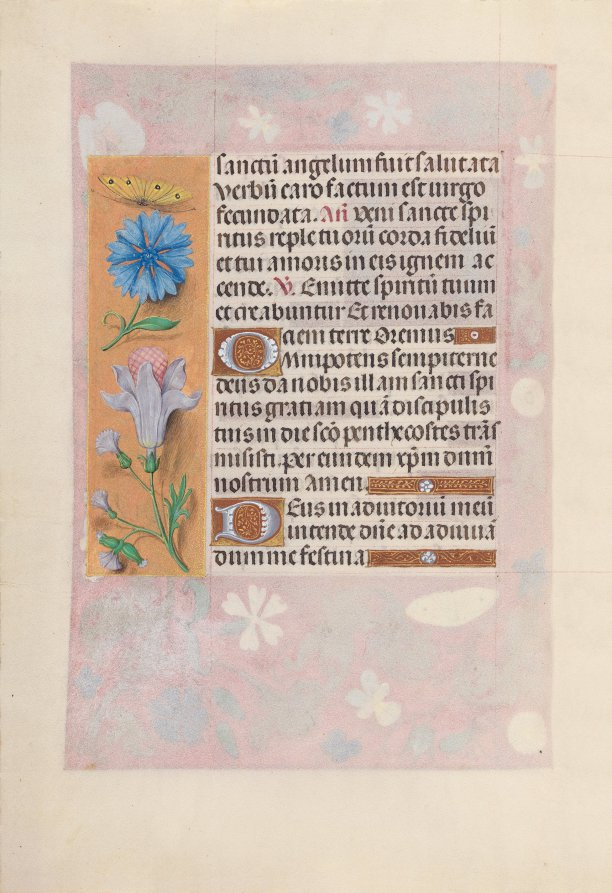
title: Hours of Queen Isabella the Catholic, Queen of Spain: Fol. 32v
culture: Flanders, Ghent and Bruges, late 15th century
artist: Master of the First Prayerbook of Maximillian (Flemish, c. 1444–1519)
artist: and Associates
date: c. 1500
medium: ink, tempera, and gold on vellum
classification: Bound Volume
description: A great lover of Flemish art, Queen Isabella treasured her many devotional books. This deluxe manuscript was created for her private devotions by highly organized and distinctly talented manuscript painters active in Ghent and Bruges. The Ghent-Bruges school represents the culmination of Flemish book painting, whose main features were the use of rich colors, illusionistic effects, a love of landscape, and a strong sense of visual narrative. Manuscripts produced by this circle of artists are renowned for their border decoration featuring a rich variety of realistically painted flowers, scrolling acanthus leaves, birds, and butterflies.